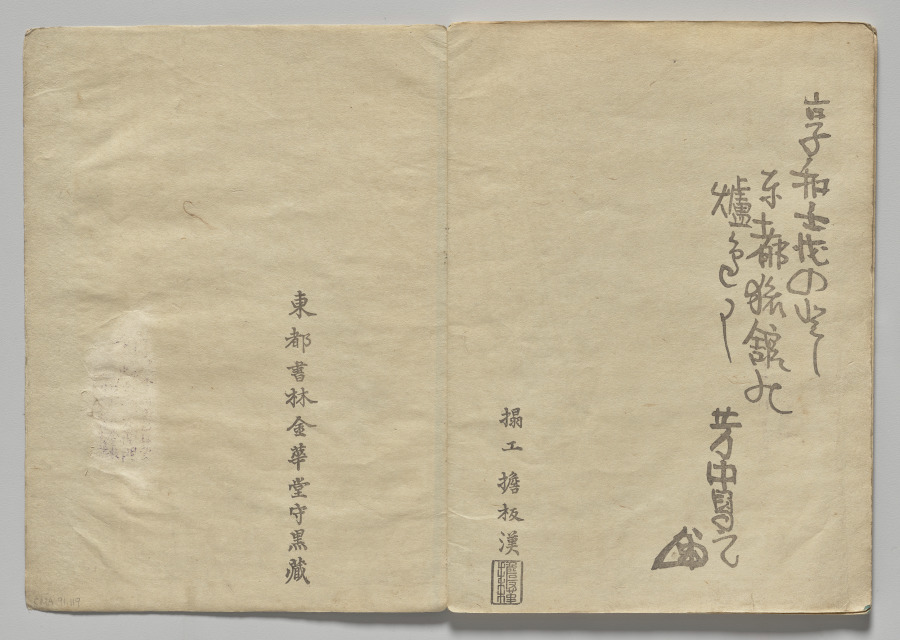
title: Scene from The Kōrin Picture Book (Volume 1)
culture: Japan, Edo period (1615–1868)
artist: Nakamura Hōchū (Japanese, d. 1819)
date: 1800s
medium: color woodblock printed book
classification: Bound Volume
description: Ogata Korin (1658-1716) was one of the most admired artists of Rimpa, or "decorative school painting." These books by the charming later-generation Rimpa artist Hochu record Korin's inventive designs.